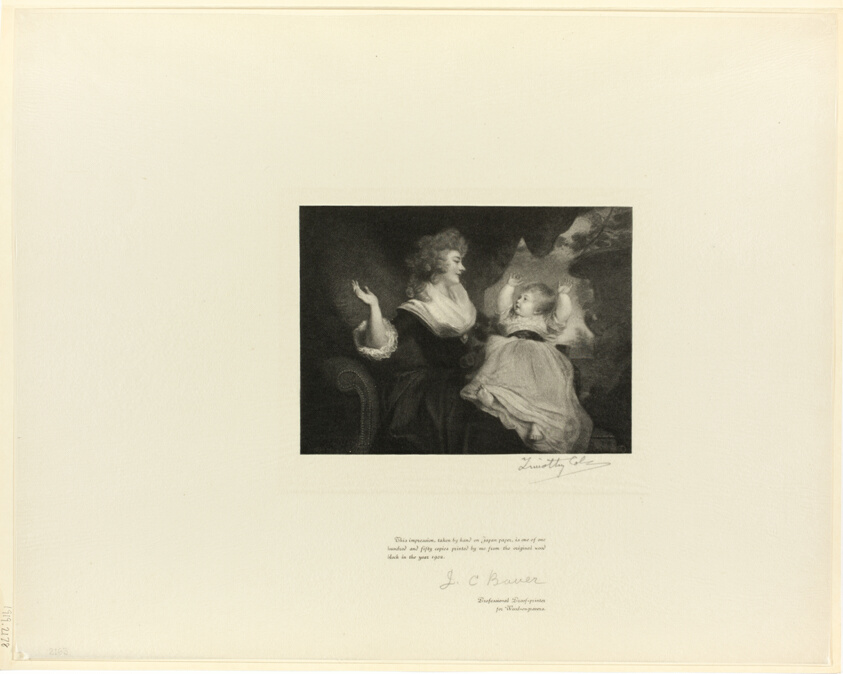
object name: Print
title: Duchess of Devonshire and child, from Old English Masters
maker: Timothy Cole (American, born England, 1852-1931); after Sir Joshua Reynolds (English, 1723-1792)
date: 1897, printed 1902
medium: Wood engraving on chine paper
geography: United States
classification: wood engraving; print; prints and drawing